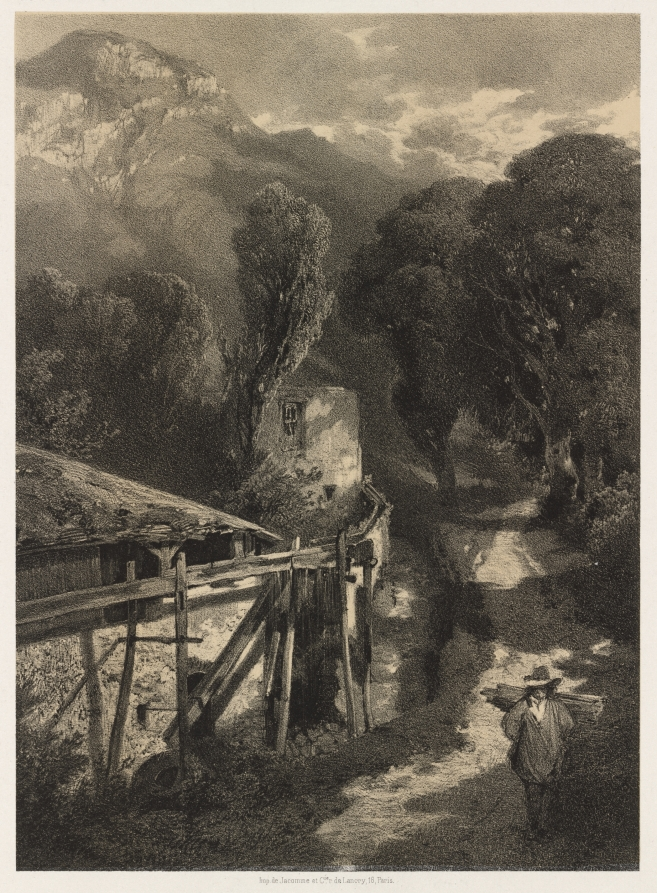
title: The Simplon Road, Meillerie, France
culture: Switzerland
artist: Alexandre Calame (Swiss, 1810–1864)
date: mid-1800s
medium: lithograph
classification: Print